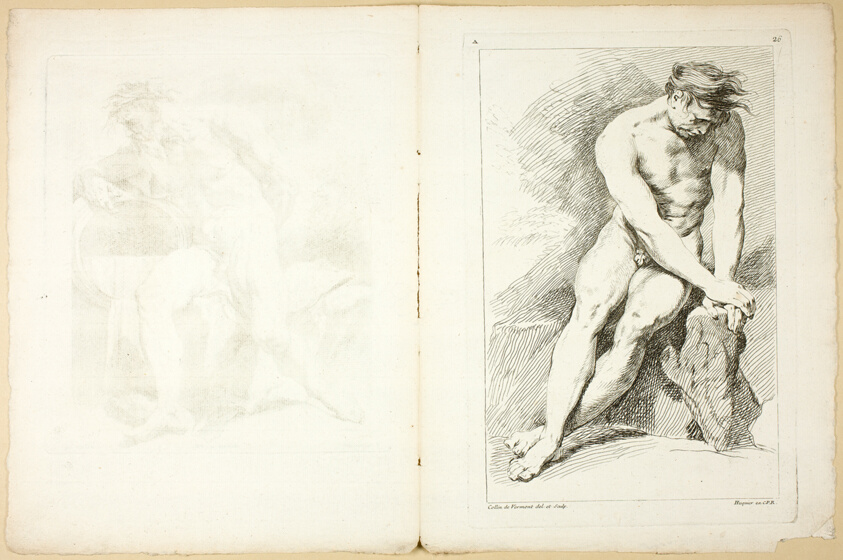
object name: Print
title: Page 26 and Page 27, from Premier Livre de Figures d’Académies Gravées en Partie par les Professeurs de l’Académie Royale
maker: Collin de Vermont (French, 1693-1761); Charles-Nicholas Cochin, the younger (French, 1715-1790); after Charles-Joseph Natoire (French, 1700-1777); printed by Gabriel Huquier (French, 1695-1772); published by Charles-Antoine Jombert (French, 1712-1784)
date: published 1737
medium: Etching on ivory laid paper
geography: France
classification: etching; print; prints and drawing